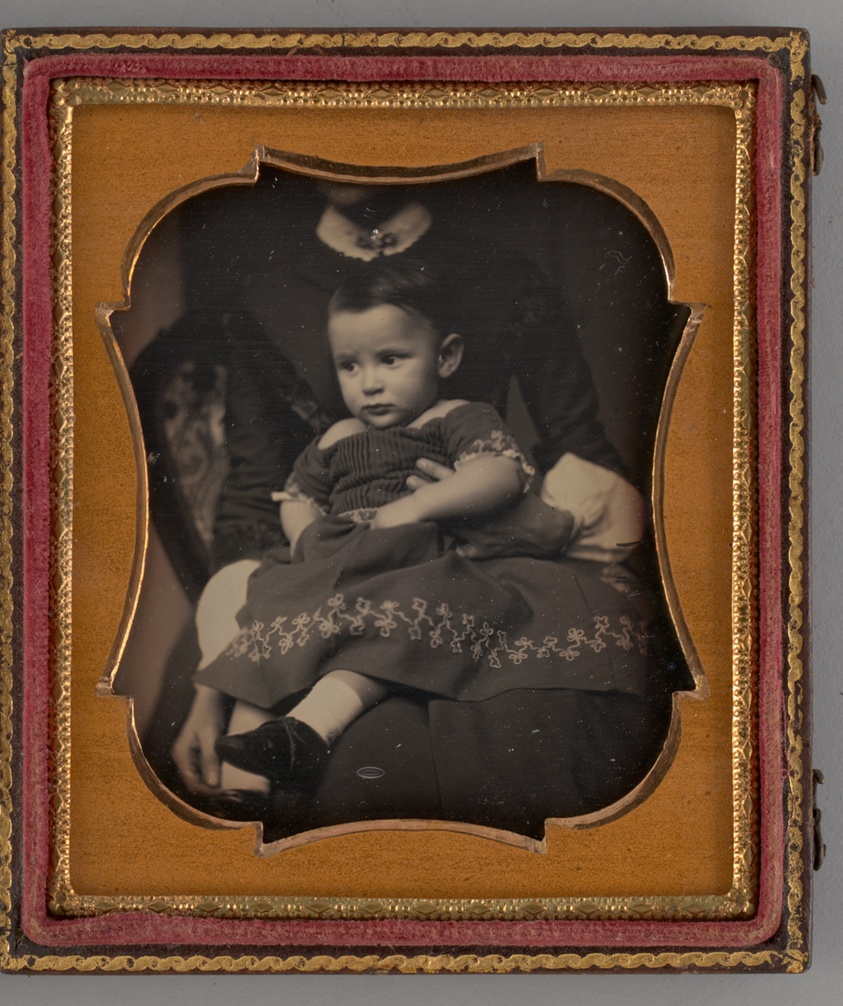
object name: Photograph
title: Untitled (Portrait of a Girl)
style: 19th century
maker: Unknown maker; American, 19th century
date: 1852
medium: Daguerreotype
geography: United States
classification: portrait; photograph; photographic process; photography; portrait; daguerreotype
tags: lundberg collection, portrait, mother and child, girls, females, babies, portraits, portraits: child subject